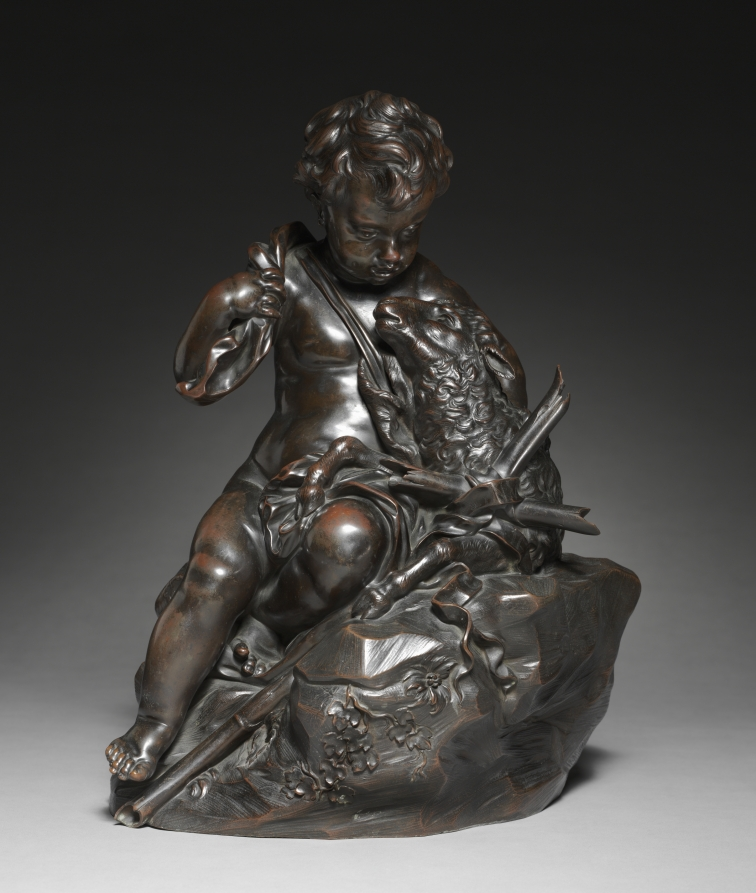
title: Young Saint John and the Lamb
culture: Italy, Florence, 17th century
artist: probably by Giuseppe Piamontini (Italian, 1664–1742)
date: c. 1680–1700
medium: bronze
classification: Sculpture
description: John the Baptist is often accompanied by a lamb as a sign of his intimacy with Christ, the Lamb of God. The depiction of children embracing animals is a motif from antiquity that Piamontini would have known.